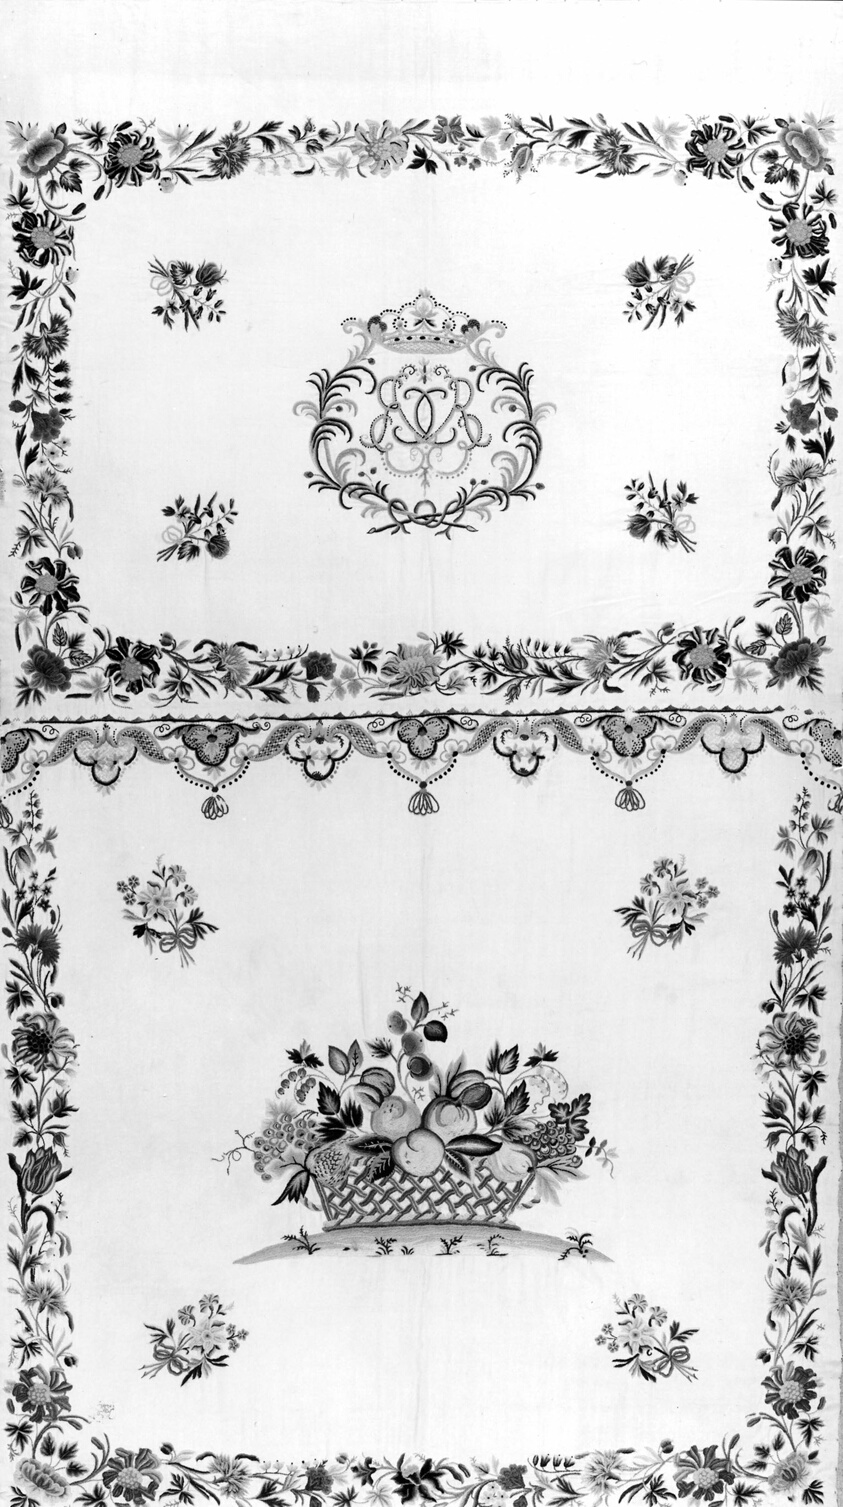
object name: Textile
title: Praying Stool Cover (Prie-Dieu)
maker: France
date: c. 1730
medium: Wool, twill weave; embroidered with wool yarns in satin and outline stitches; French knots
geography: France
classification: textile; needlework (visual works)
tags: coat of arms, royalty